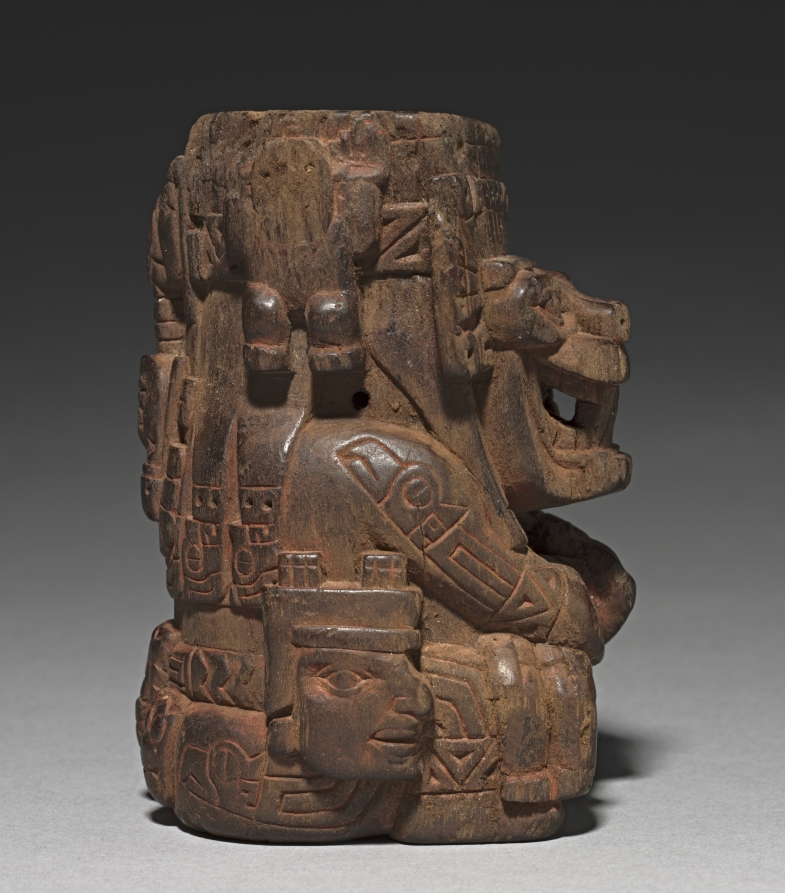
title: Sacrificer Container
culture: Central Andes, Wari style (600-1000)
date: 770–890 (radiocarbon date, 95% probability)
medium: wood and cinnabar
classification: Wood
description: This container assumes the shape of a magnificent, feline-headed, supernatural sacrificer who draws a knife across the throat of the human it holds in its lap. Severed human heads hang from the feline's belt and dangle by the trachea at the back of its headdress. Sacrifice had a place in Wari religious practice, probably as an unusual and exceptionally precious offering made to entice the benevolence of cosmic forces. Indeed, colonial-period Andean people believed that death was a prerequisite for the renewal of the world.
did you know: Traces of cinnabar, a toxic mercuric sulfide, are visible on the container's surface.